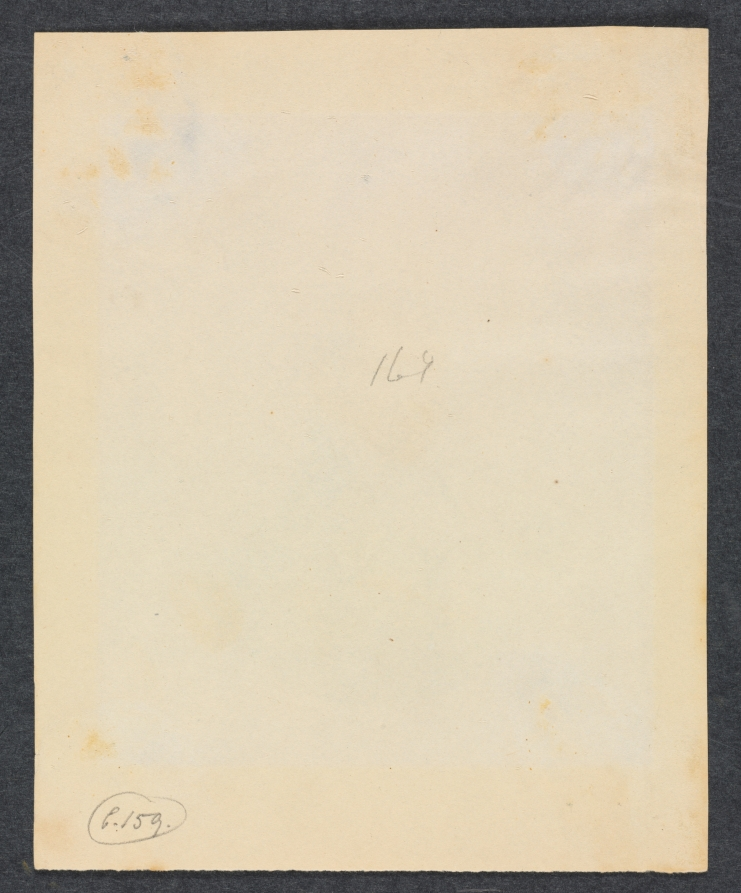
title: Portrait of General Keith MacAlister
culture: England, 18th century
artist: John I Smart (British, 1741–1811)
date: c. 1800–1810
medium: watercolor and graphite, heightened with traces of white gouache, on paper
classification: Portrait Miniature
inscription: across bottom, in graphite: Genl Macalester ; VERSO, center, in graphite: 169; lower left, in graphite: l. 159. [circled]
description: Although it is impossible to say if it was always part of the artist’s process to execute a preparatory sketch prior to painting each miniature, we do know that John Smart retained many hundreds of these sketches. A great number were inherited by his son John James Smart, who in turn left them to his daughter Mary Ann Bose. Upon her death in 1934, they were divided between three of her children: William Henry Bose, Lilian Dyer, and Mabel Annie Busteed. General MacAlister is represented in three-quarter view, bust length, and facing the right. His eyes are blue, but the right eye is clouded and lighter in color than the left. There is no sign of isolated damage or fading, confirming that this color difference was among MacAlister’s physical attributes. He wears a brown coat; white, frilled vest edged in black; tall collar; and a white cravat tied in a bow. His closely cropped hair is powdered, and an unidentified rocky landscape through which a small river runs is painted in the background; it probably represents a place of personal significance in Scotland or India, possibly even Seringapatam and the Cauvery River. Smart depicted MacAlister inside of a penciled oval tromp l’oeil frame. The drawing is replete with physically informative details and is larger and more finished than drawings intended to function exclusively as preparatory sketches, though it may also have served this purpose. Beneath the elaborate penciled border is written in large graphite script “Genl Macalester.” This inscription is not in the artist’s hand and almost certainly a later addition. A Colnaghi label was removed from the verso after the work entered the museum’s collection. The sitter is likely Major-General Keith MacAlister (1746–1820) of the Madras Cavalry. He was the eldest of three soldier brothers who served with distinction in India. MacAlister was born at Skerrinish in the Isle of Skye and ascended through the ranks rapidly following his appointment as cadet in 1777. He became captain in 1796; lieutenant-colonel in 1799; colonel in 1809; and major-general in 1812. He is celebrated particularly for his role in the 1799 storming and capture of Seringapatam, a decisive battleground in the Fourth Anglo-Mysore War, and for rescuing his brother Matthew from a long imprisonment in the same city. MacAlister was also instrumental in organizing the Madras Light Cavalry.5 Smart’s portrait of MacAlister would have been painted between 1800 and 1810, when the sitter was an older man and had returned to England before settling in Scotland. The Nelson-Atkins Museum of Art owns a Smart portrait on ivory called Keith Michael Alexander, dated 1810. Although he wears a military uniform rather than civilian clothes, the sitter is identical to the one in the Cleveland drawing—note in particular the differently colored eyes and the blue veins at the left temple. Although it was painted in 1810, possibly some years after the Cleveland sketch, the sitter’s hair loss is more pronounced in the earlier drawing. This inconsistency can be explained by the fact that Regency fashion called for men to comb their hair forward, thereby obscuring baldness, as seen here. Otherwise, the portraits are so similar that it is likely that Smart was consulting the earlier finished drawing when executing the 1810 miniature in ivory. Both “General Macalister” and “Colonel Keith Michael Alexander” are listed by Daphne Foskett among Smart’s sitters, but she reproduces images only of the latter Nelson-Atkins miniature. No additional portraits of the period depicting gentlemen of either name have been discovered at this time. The Nelson-Atkins ivory has been called Keith Michael Alexander by tradition at least since it was in the Mr. and Mrs. John W. Starr collection before entering the museum in 1958. However, the miniature has not been removed from the frame since its acquisition, and there is no evidence of an inscription. It is likely that Keith Michael Alexander is a mistaken interpretation of the name Keith MacAlister, particularly because no record of a soldier by the name of Keith Michael Alexander has been discovered.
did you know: Sketches helped John Smart work out the particulars of a portrait before commencing the miniature on ivory; they were useful in the event that a duplicate might later be required.